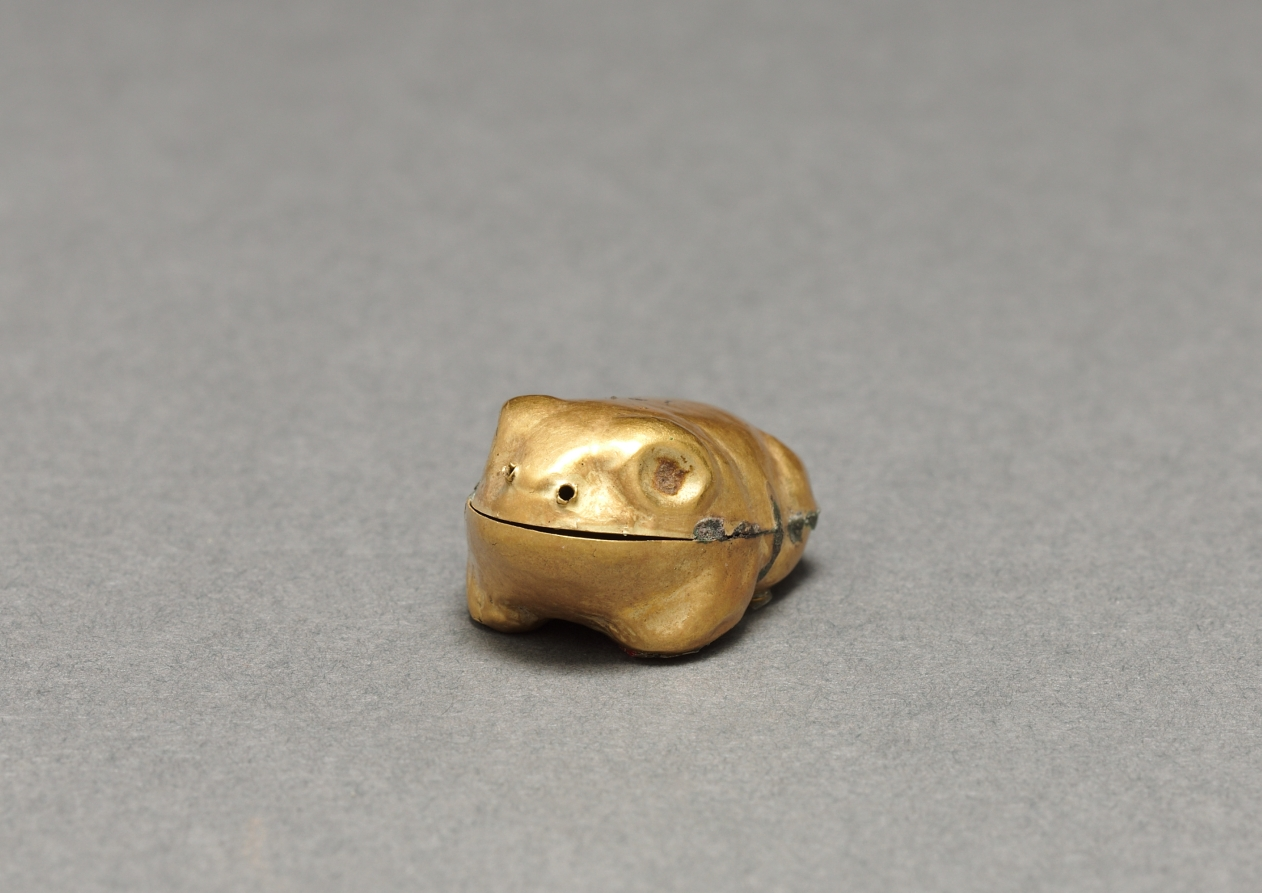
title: Frog Pendant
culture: Peru, Moche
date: 200–700 CE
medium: gold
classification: Metalwork